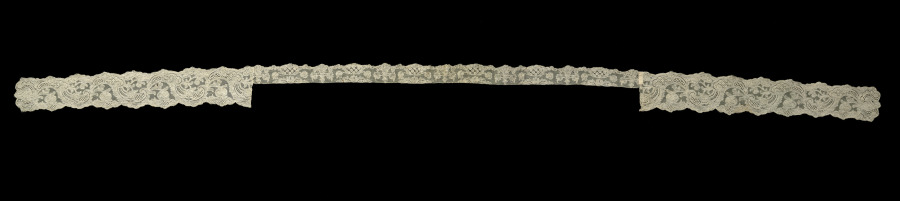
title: Lace Lappets and Edging for Cap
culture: Belgium, Mechelen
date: 1700s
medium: Bobbin lace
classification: Lace